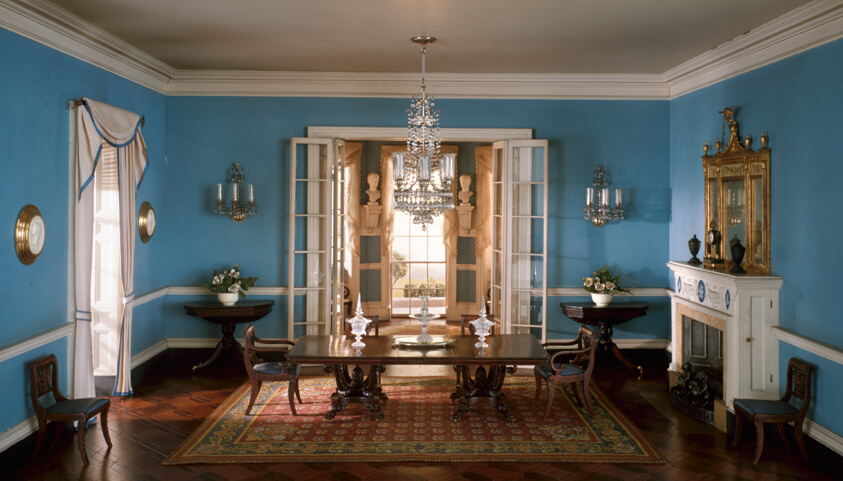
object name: Miniature room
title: A26: Virginia Dining Room, c. 1800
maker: Designed by Narcissa Niblack Thorne; American, 1882-1966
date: c. 1940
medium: Miniature room, mixed media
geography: United States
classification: miniature; thorne rooms